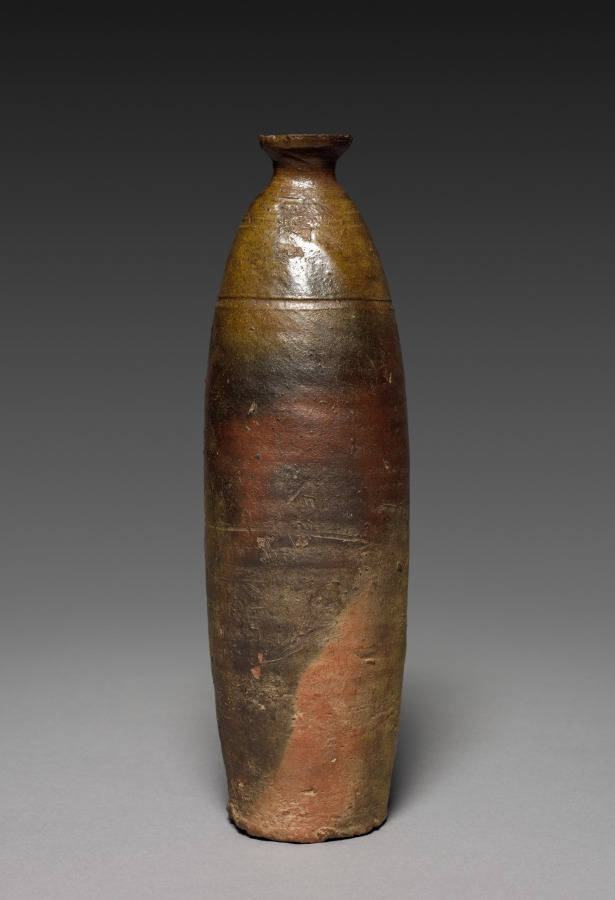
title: Sake Bottle: Ryukyu Namban Ware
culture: Japan, Edo period (1615–1868)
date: 1700s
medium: Ryukyu Namban Ware: stoneware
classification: Ceramic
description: Note the rich color gradations over the body that range from a deep brown to olive to ochre to a rust-red. The incised and gouged markings on the bottle contribute to its rustic texture.